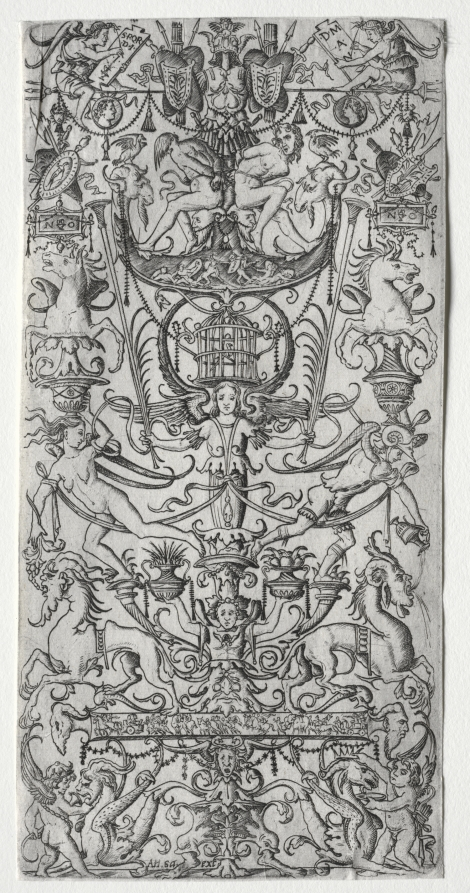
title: Ornament Panel with a Bird Cage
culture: Italy, 16th century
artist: Nicoletto da Modena (Italian, active c. 1500–1520)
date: c. 1500–1512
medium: engraving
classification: Print